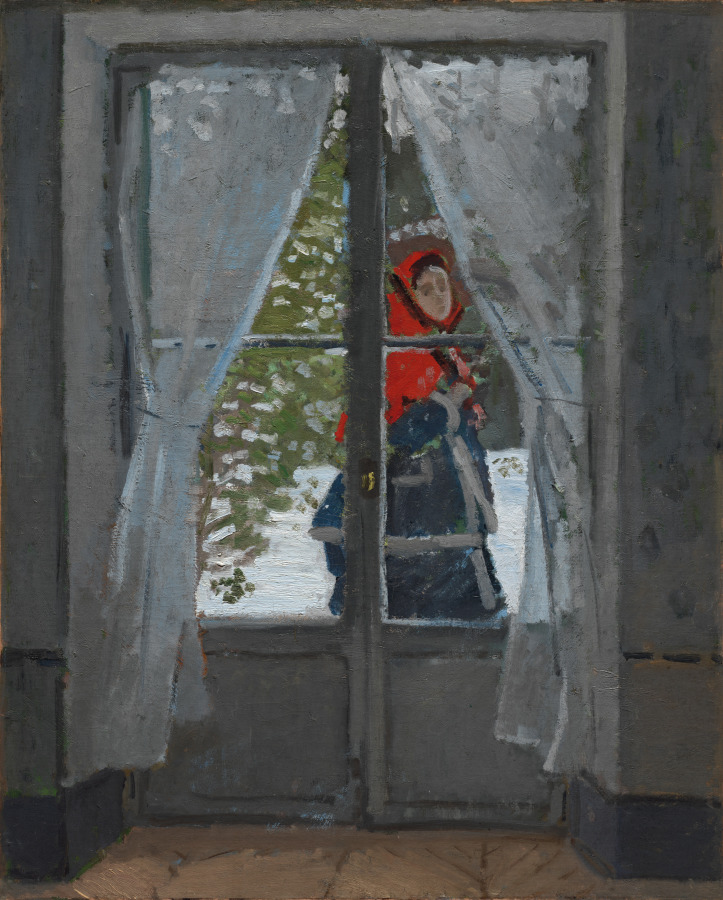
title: The Red Kerchief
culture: France, 19th century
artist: Claude Monet (French, 1840–1926)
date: c. 1868–73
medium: oil on fabric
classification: Painting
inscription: Not signed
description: This painting depicts Monet's first wife, Camille, outside on a snowy day passing by the French doors of their home at Argenteuil. Her face is rendered in a radically bold Impressionist technique of mere daubs of paint quickly applied, just as the snow and trees are defined by broad, broken strokes of pure white and green.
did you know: Madame Monet’s red cape draws the viewer’s attention beyond the glass of the French doors capturing her glance, a brief moment frozen in time. This painting was very special to Monet and he kept it with him for his entire life.